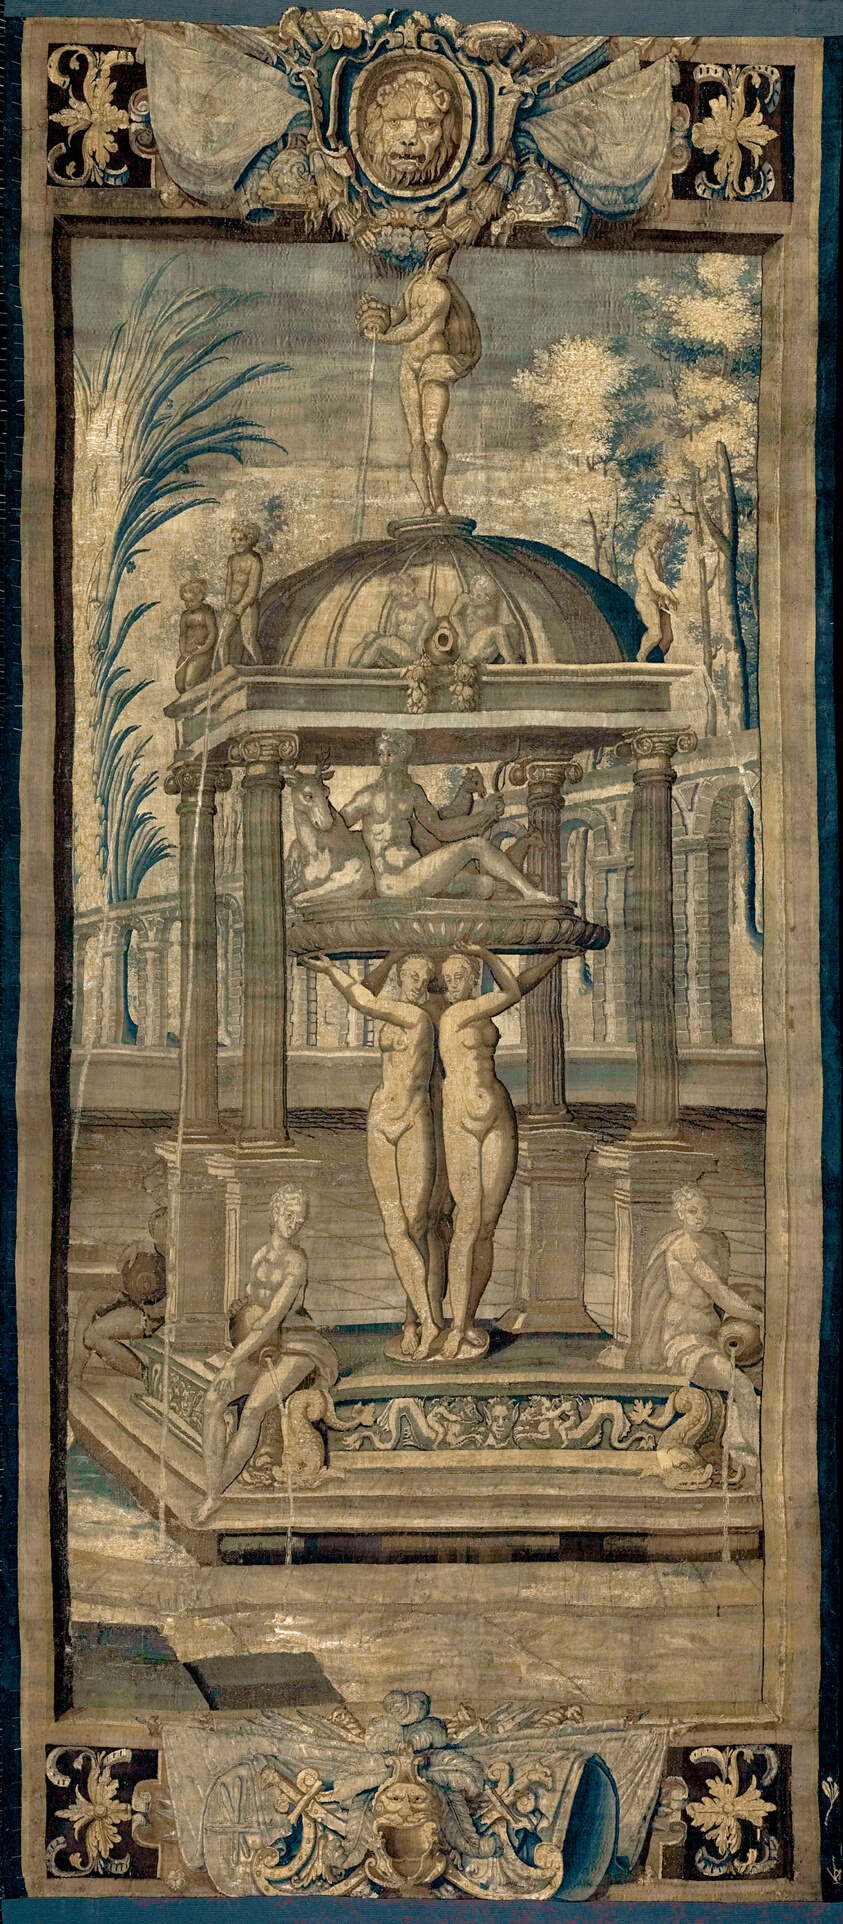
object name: Coverings and Hangings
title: The Petitions [right part]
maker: After a design by Antoine Caron (1521–1599); Woven at an unknown workshop at the Manufacture du Faubourg Saint-Marcel; France, Paris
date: 1607/30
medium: Wool and silk, slit and double interlocking tapestry weave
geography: France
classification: weaving - tapestry; textile